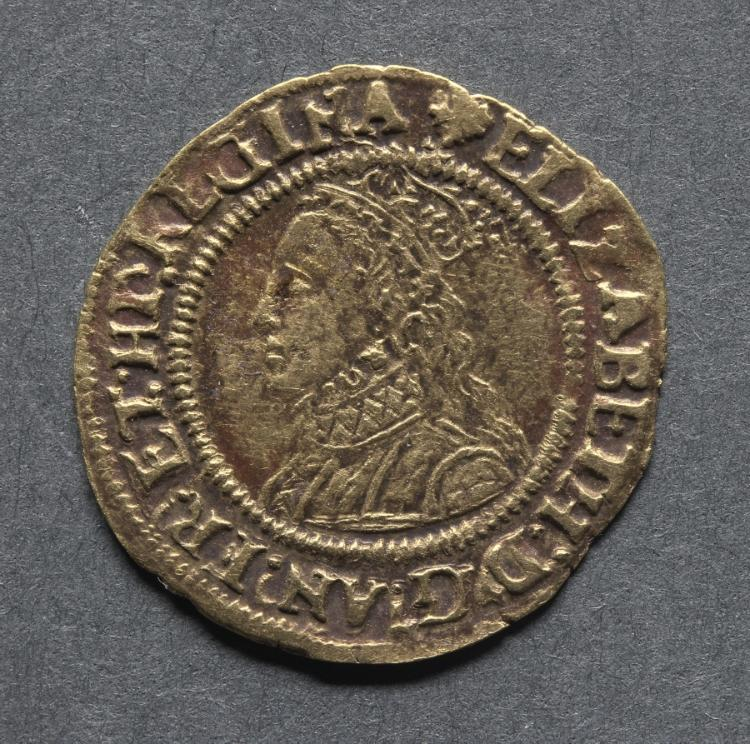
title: Halfcrown: Elizabeth I (obverse)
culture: England, Elizabeth I, 1558-1603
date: 1560–1561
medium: gold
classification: Coins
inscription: ELIZABETH D G AN FR ET HI REGINA